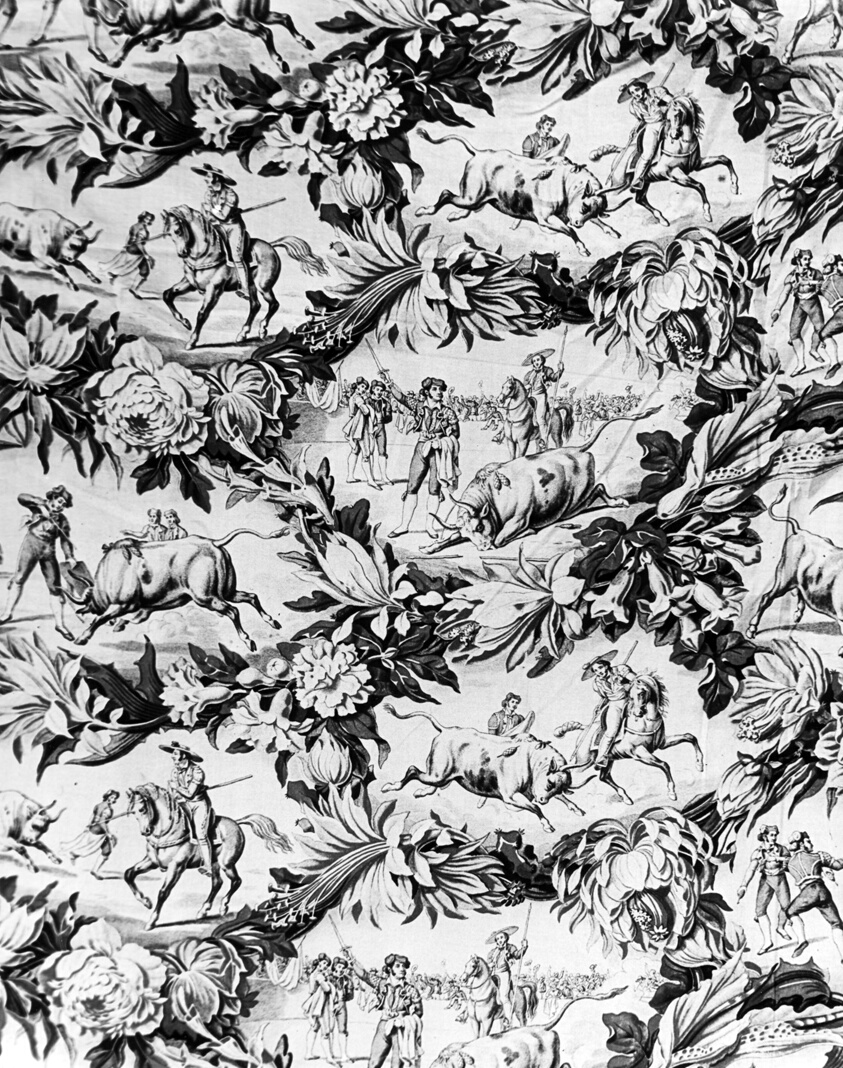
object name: Textile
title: Tauromachine (The Bull Fight) (Furnishing Fabric)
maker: France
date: c. 1840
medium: Cotton, plain weave; copperplate printed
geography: England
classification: textile; weaving - printed; furnishing textile